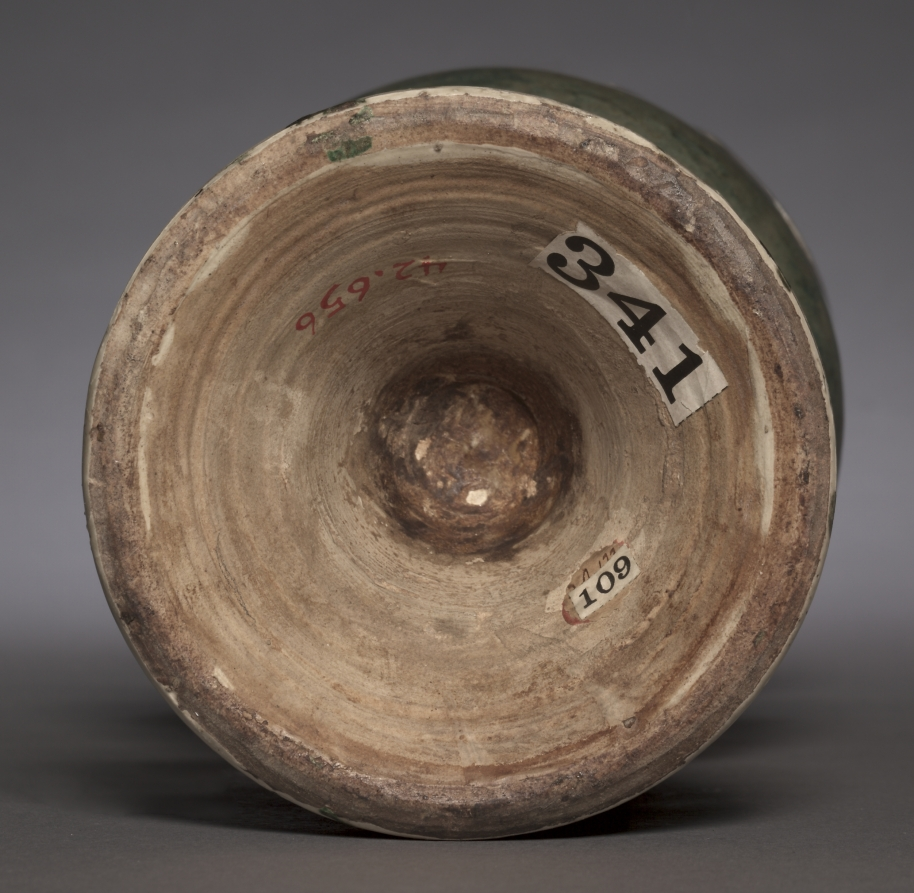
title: Vase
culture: Northern China, Liao dynasty (916-1125) or Northern Song dynasty (960-1127)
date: 1000s–1100s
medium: green-glazed stoneware with underglaze white-slip coating, Cizhou ware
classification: Ceramic